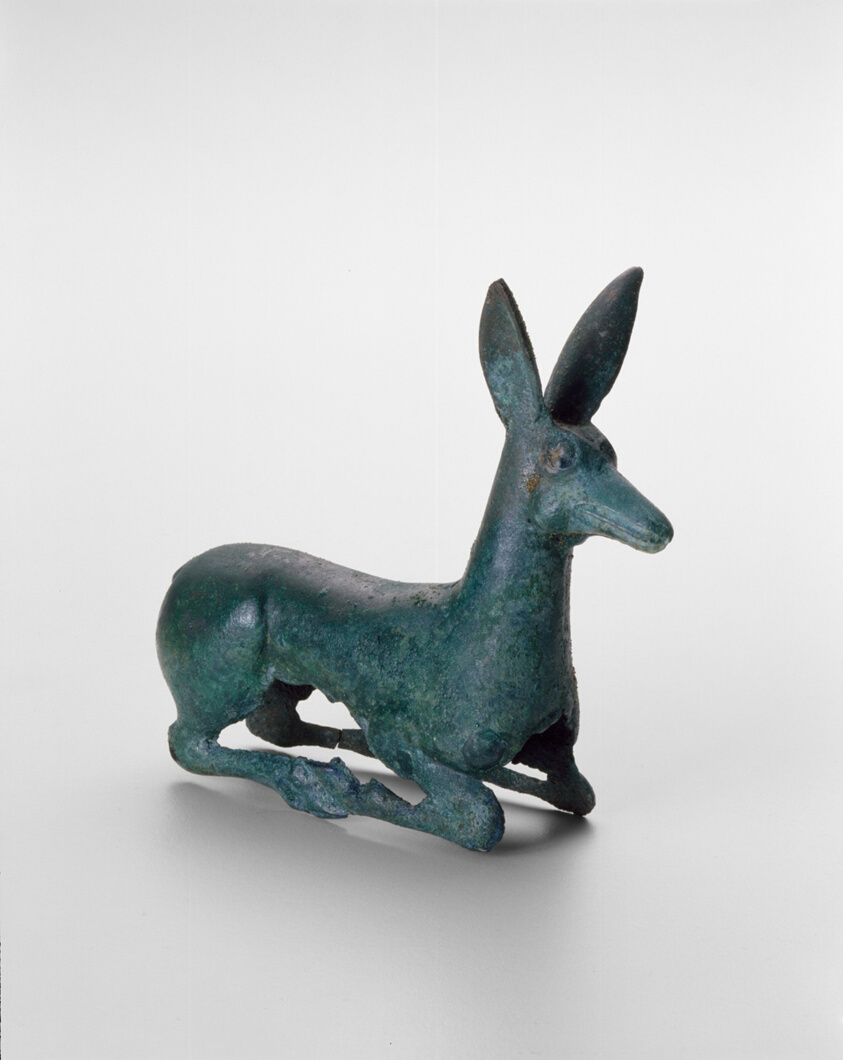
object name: Metalwork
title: Ornament with Recumbent Deer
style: Chinese (culture or style)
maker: Northwestern Inner Mongolia or Northwestern China (Ningxia and Gansu provinces)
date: 6th/4th century B.C.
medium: Bronze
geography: China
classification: bronze; metal; decorative object/ornament; asian art; metalwork